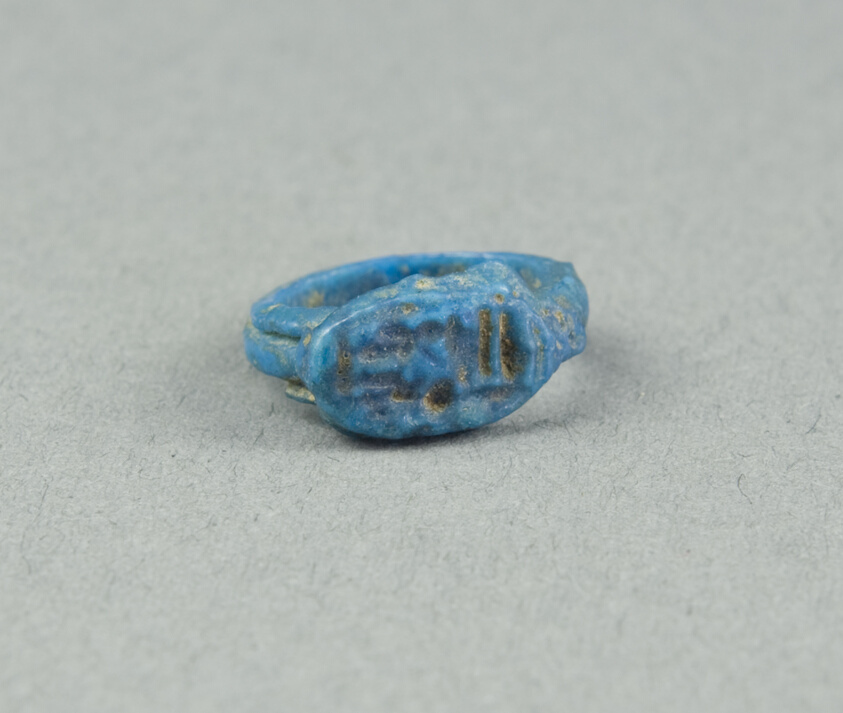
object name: Costume and Accessories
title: Ring: Ramesses (II), Beloved of Amun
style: nineteenth dynasty, new kingdom, egyptian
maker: Egyptian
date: New Kingdom, Dynasty 19, reign of Ramesses II (about 1279–1213 BCE)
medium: Faience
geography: Egypt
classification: ring (jewelry); ceramics; jewelry; ancient art; costume; faïence (composite material)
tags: pharaohs, kings